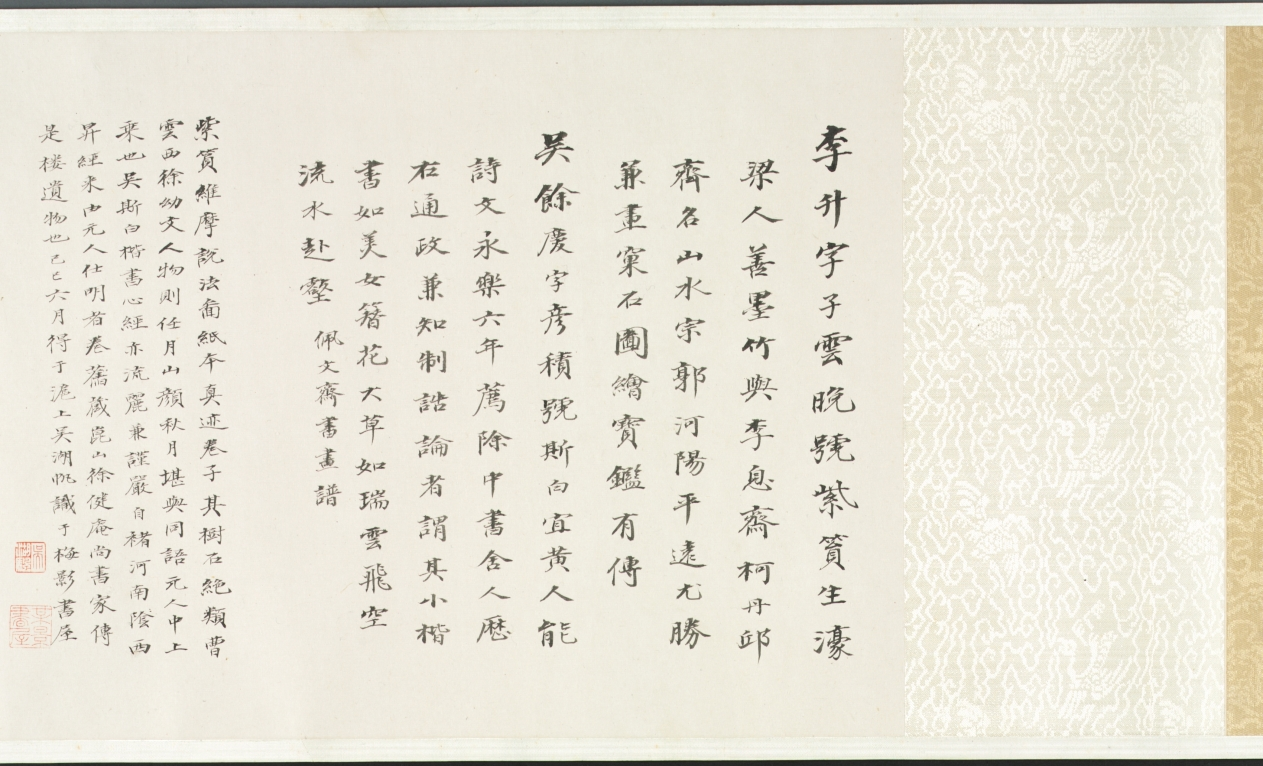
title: Buddha's Conversion of Five Bhiksu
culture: China, Yuan dynasty (1271–1368)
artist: Li Sheng (Chinese, active c. 1324–after 1375)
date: mid-1300s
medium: handscroll; ink on paper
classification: Painting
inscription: 紫篔生李升識 [印] 李氏子雲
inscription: 4 colophons and 12 additional seals: The "Heart" Sutra (Maha Prajnaparamita) text written by Wu Yuqing 吳餘慶 (active early 1400s); 2 seals of Xu Qianxue 徐乾學 (1631–1694); 3 colophons, one dated 1929 and two dated 1936, and 9 seals of Wu Hufan 吳湖帆 (1894–1968); 1 colophon, dated 1932, of Chen Dingshan; 1 seal unidentified.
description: This episode stems from the life of the historical Buddha, who, after his enlightenment, was initially hesitant about preaching his own doctrine. After much personal deliberation and prodding by deities, he finally relented. The first converts were the five guards who served him when he was still a prince. For Li Sheng, this is the pretext of the painting, which moves from the interaction of the bhiksu with the Buddha to a broader awareness of the vast surroundings of the scene.